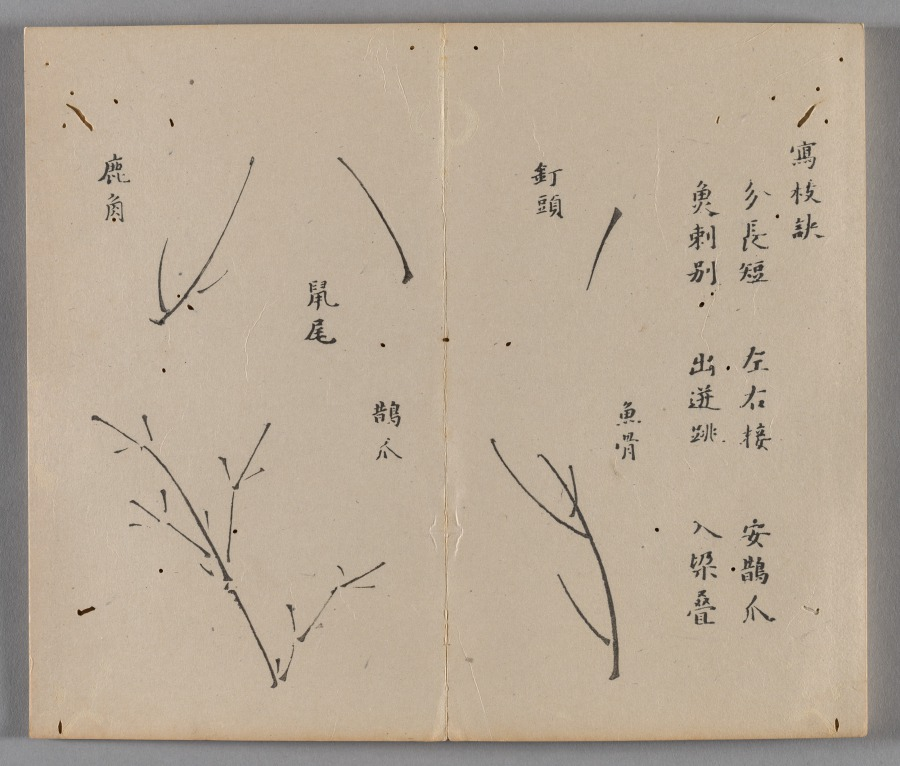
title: Ten Bamboo Studio Painting and Calligraphy Handbook (Shizhuzhai shuhua pu): Bamboo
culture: China, Qing dynasty (1644-1911)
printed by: Hu Zhengyan (Chinese, c. 1584–1674)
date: 1633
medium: Woodblock-printed book; ink and colors on paper; first edition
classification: Print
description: Color printing reached a level of perfection in the early 1600s, as seen in this Ten Bamboo Studio Collection of Calligraphy and Painting and the Mustard Seed Garden Manual of Painting (printed 1679 and 1701). The painterly quality, precision in registering (aligning) the woodblocks, and harmonious colors made them the most successful color print editions in Chinese history. Both editions were printed and compiled in Nanjing, spread nationwide, and had a great impact on the arts in Japan and Korea.